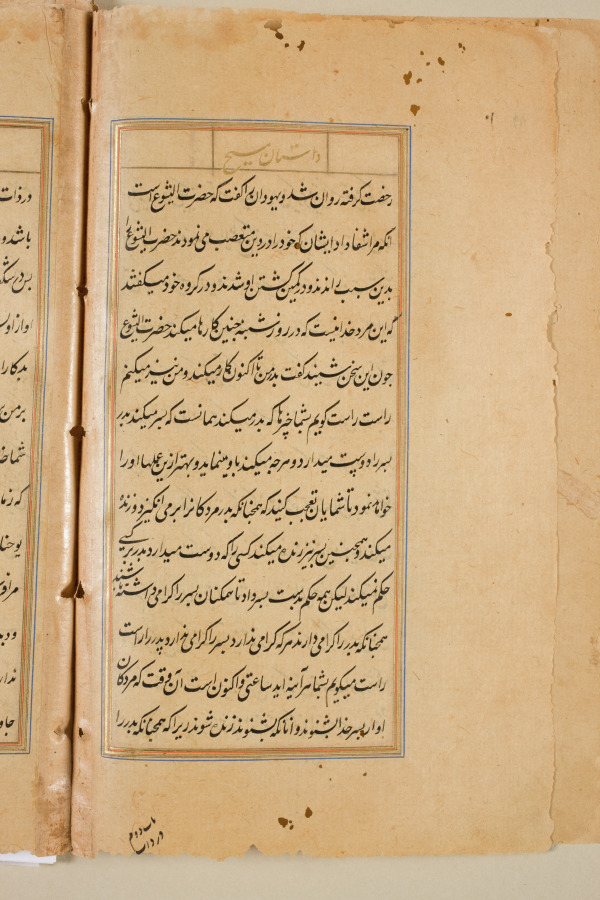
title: Text page from a Mirror of Holiness (Mir’at al-quds) of Father Jerome Xavier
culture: Mughal India, Allahabad, made for Prince Salim (1569–1627)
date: 1602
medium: Ink and gold on paper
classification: Manuscript